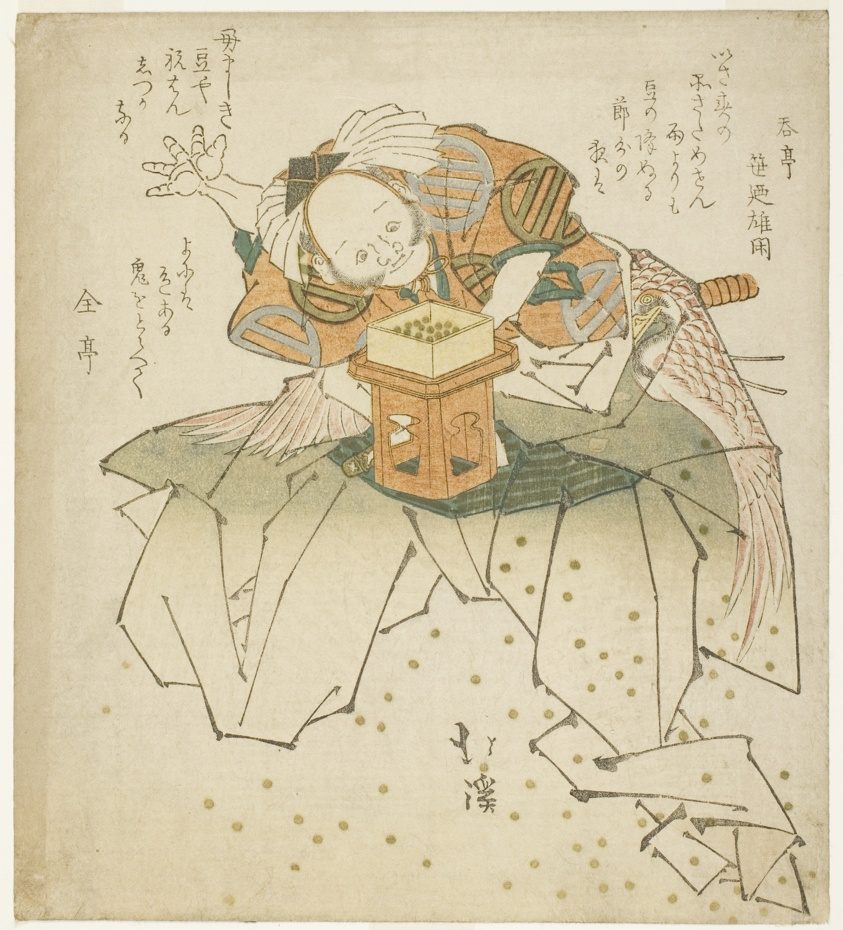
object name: Print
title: Asahina Saburo throwing beans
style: Japanese (culture or style)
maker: Totoya Hokkei (Japanese, 1780-1850)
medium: Color woodblock print; shikishiban, surimono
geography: Japan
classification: woodblock print; print; asian art